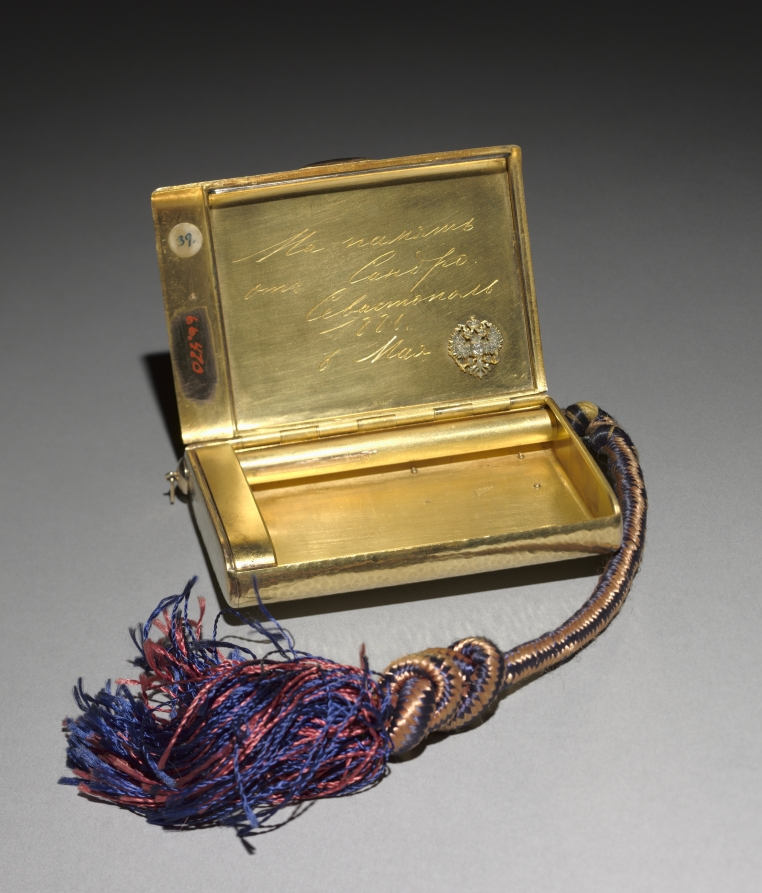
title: Cigarette Case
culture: Russia, St. Petersburg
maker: attributed to House of Fabergé (Russian, 1842–1918)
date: 1886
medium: gold, enamel, diamonds, silk cord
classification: Miscellaneous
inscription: inscribed: In Rembrance/from Sandro/Sevastopol/1886/6 May in Cyrillic script.